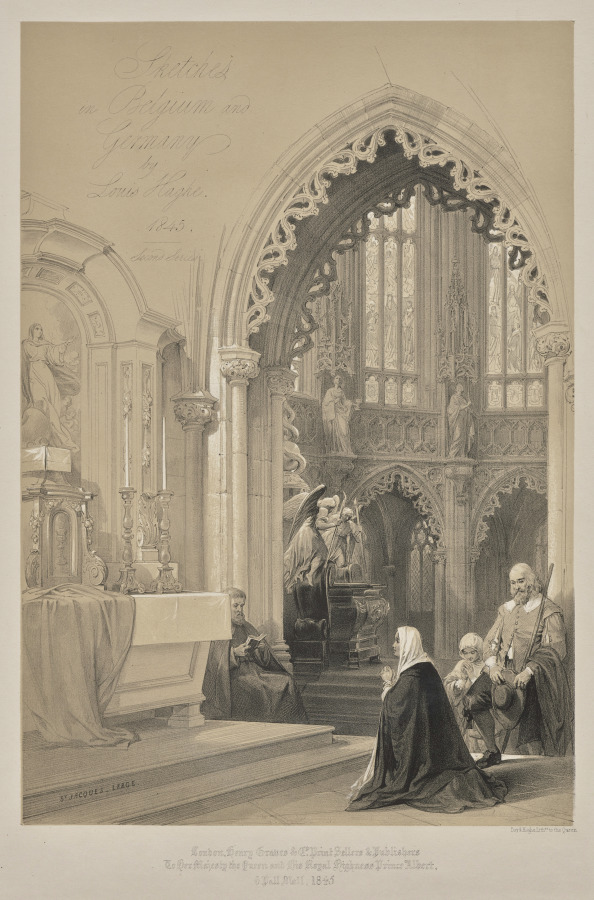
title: Sketches in Belgium and Germany, Second Series: No. 1 - Title Page - St. Jacques, Liege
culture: England, 19th century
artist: Louis Haghe (British, 1806–1885)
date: 1845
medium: lithograph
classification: Print